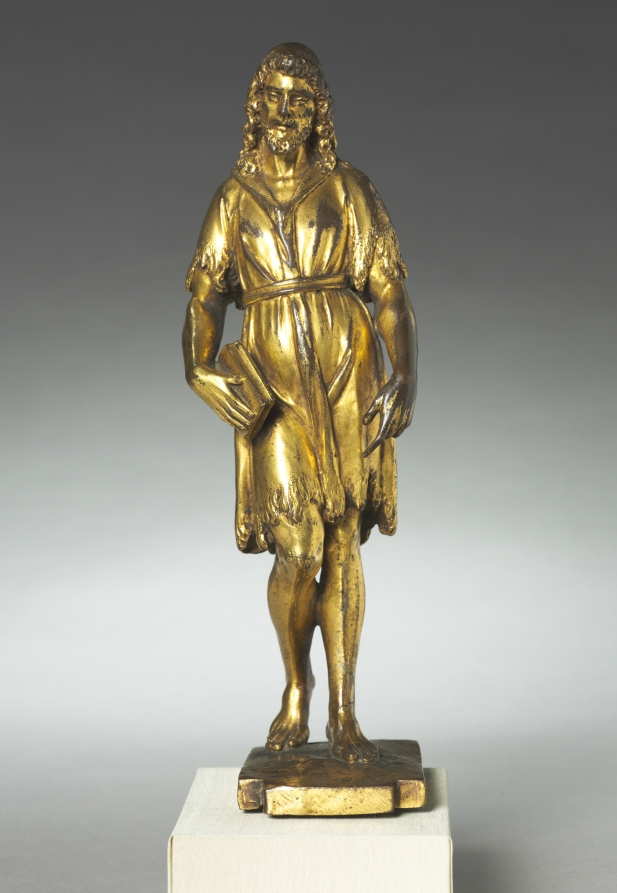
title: Saint John the Baptist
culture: Italy, Venice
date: c. 1550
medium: gilt bronze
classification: Sculpture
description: This small bronze, covered with gold, was produced in multiple versions. Saint John stands here, looking calm and composed, in a rather graceful pose. This piece has a sense of forward motion even though the figure appears to be leaning back in this stance. Elegant and subtle, this piece is a beautiful example of small cast Renaissance bronzes.